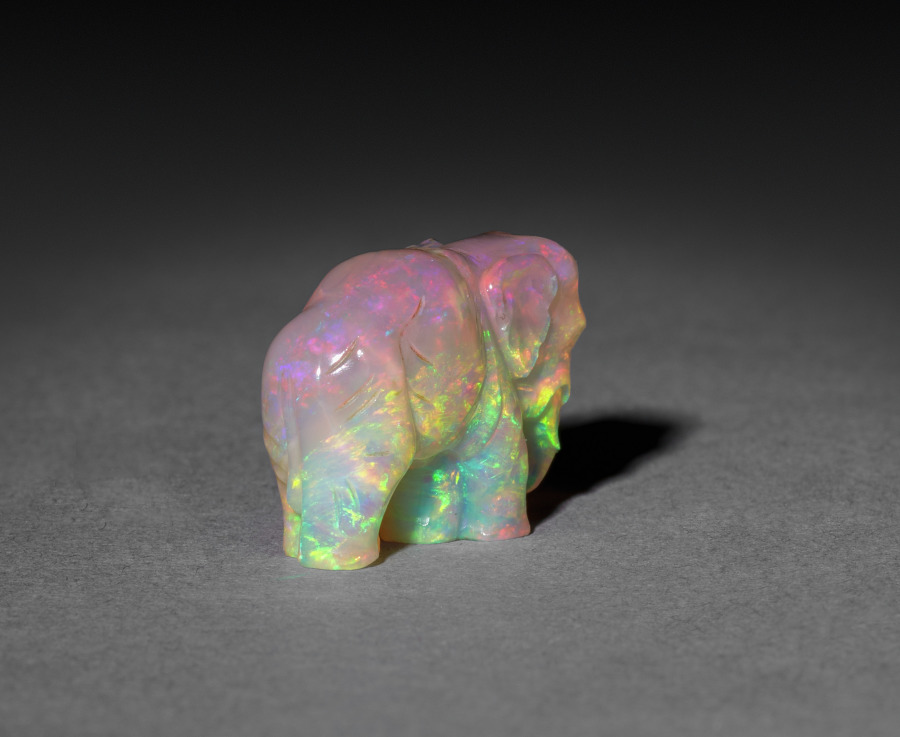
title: Elephant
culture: Russia, St. Petersburg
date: late 1800s-early 1900s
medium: opal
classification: Miscellaneous